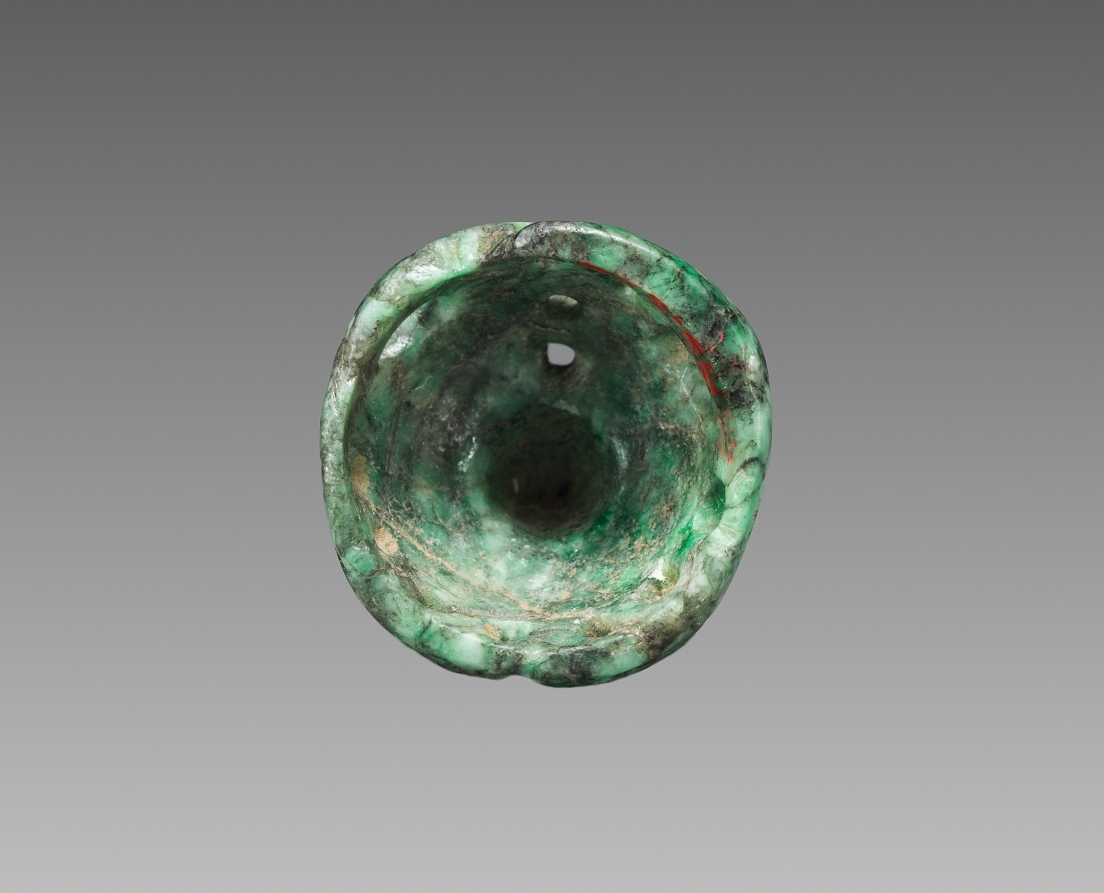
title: Mask Ornament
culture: Mesoamerica, Mexico, Olmec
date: c. 900–400 BCE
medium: jade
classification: Jade